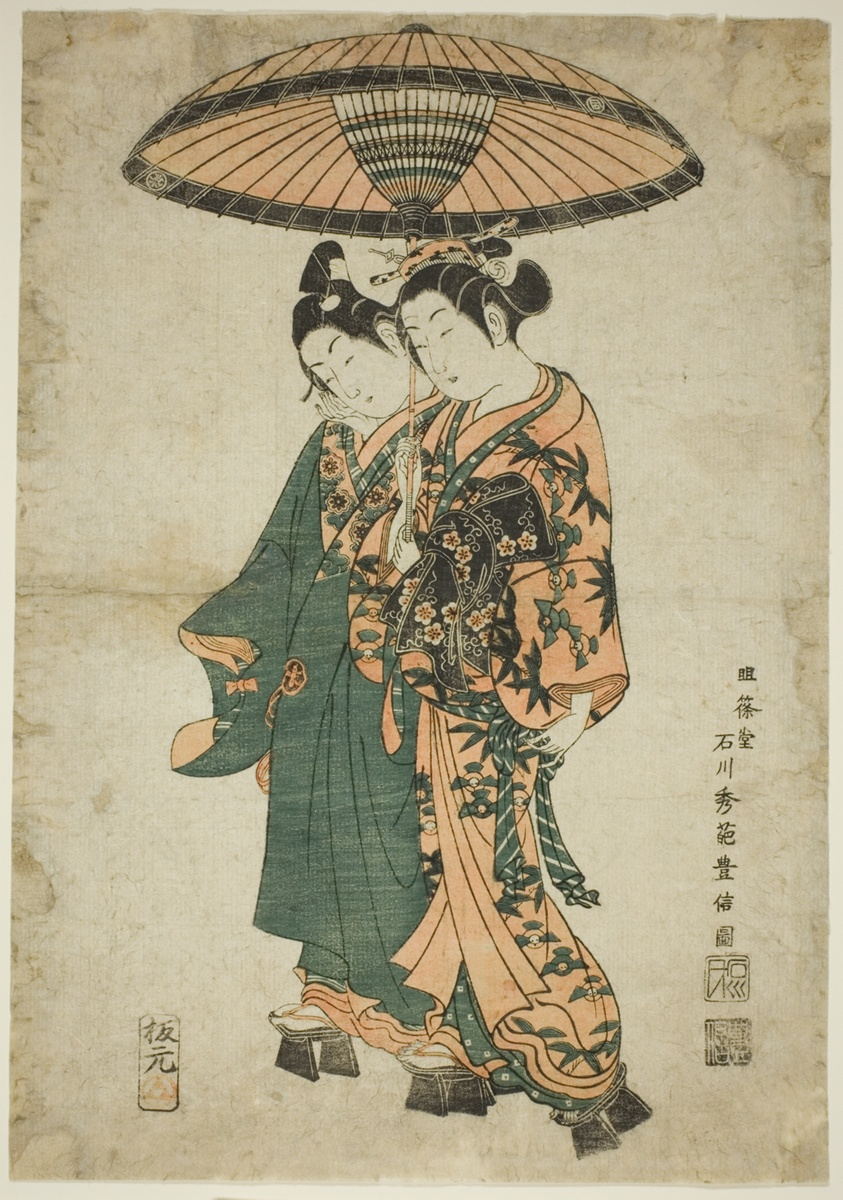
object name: Print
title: The Actors Sanogawa Ichimatsu I and Segawa Kikunojo I as lovers under an umbrella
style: Japanese (culture or style)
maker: Ishikawa Toyonobu (Japanese, 1711-1785)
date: c. 1740s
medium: Color woodblock print; oban, benizuri-e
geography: Japan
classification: woodblock print; print; asian art